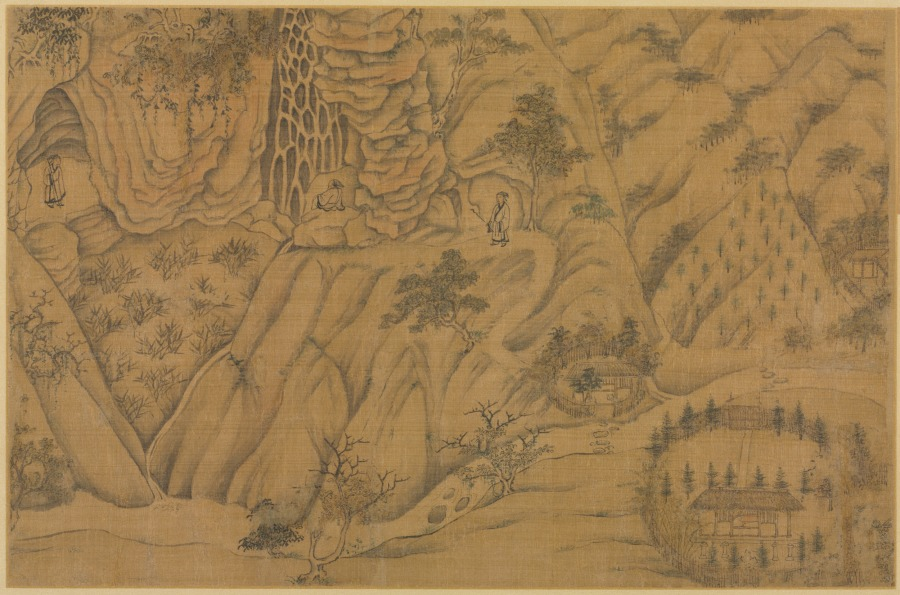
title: Dwelling in the Longmian ("Sleeping Dragon") Mountains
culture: China, Song dynasty (960-1279) - Yuan dynasty (1271-1368)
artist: Li Gonglin (Chinese, c. 1049–1106)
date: 1100s-1200s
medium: Handscroll mounted as three album leaves; ink and color on silk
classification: Painting